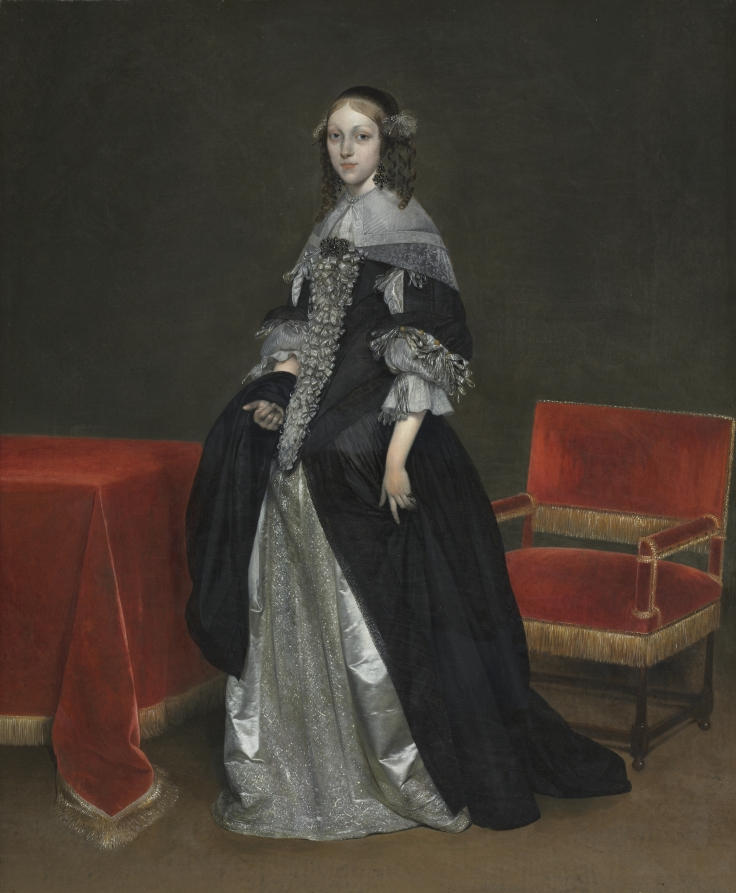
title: Portrait of a Woman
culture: Netherlands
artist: Gerard ter Borch (Dutch, 1617–1681)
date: c. 1665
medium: oil on canvas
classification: Painting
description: Every detail of his subject’s elaborate costume is skillfully recorded: glittering jewels, filmy lace, knots of ribbons, heavy black silk, and shimmering white satin. The ability to recreate satin’s luster was Gerard ter Borch’s particular trademark: he used fine flicks and sweeps of the brush, occasionally adding and wiping away tiny bits of paint to make the white fabric appear to shine. Ter Borch offset the profusion of costume detail by deliberately isolating the figure within a spare setting, allowing us to appreciate the woman’s cool composure. Although her identity is not known, she was undoubtedly a member of the wealthy Dutch elite.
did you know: The pair to this painting (in the National Gallery, London), depicts a man in equally fashionable dress.